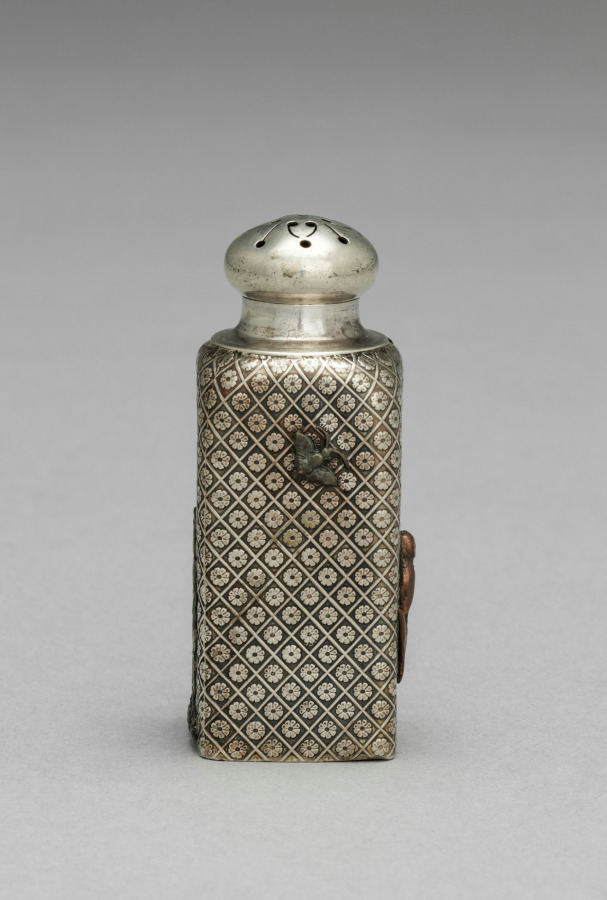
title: Pepper Shaker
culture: America, Rhode Island, Providence, 19th century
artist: Gorham Manufacturing Company (America, est. 1831)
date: c.1875–1885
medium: silver and mixed metals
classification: Silver